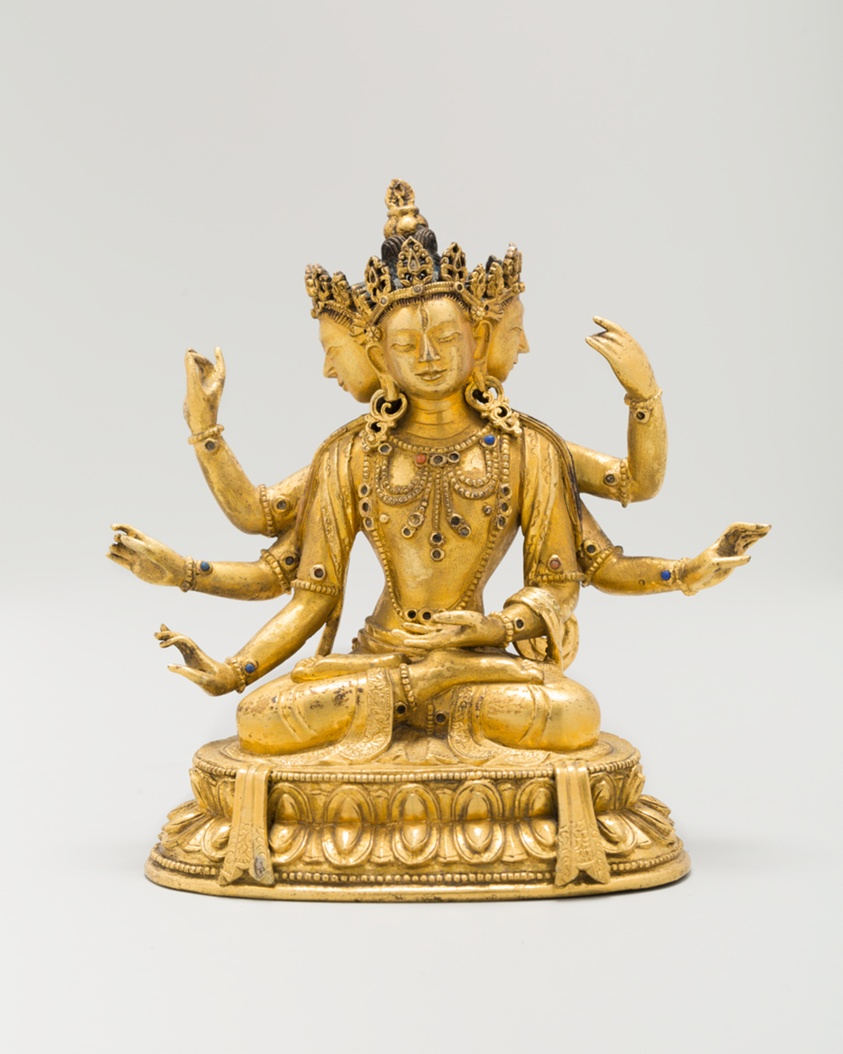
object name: Sculpture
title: Deity from a Set of Five Pancharaksha Goddesses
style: Chinese (culture or style), Himalayan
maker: China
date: Qing dynasty (1644–1911), 19th century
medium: Gilt copper alloy with lapis, coral and malachite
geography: China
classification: bronze; metal; sculpture; asian art